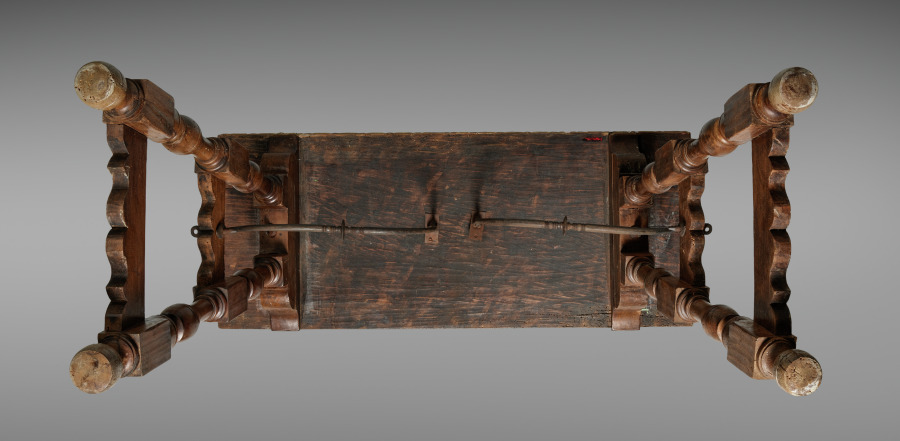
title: Chest (Base)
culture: Spain, Colonial, late 17th Century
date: late 1600s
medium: turned and joined wood with wrought iron hardware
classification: Furniture and woodwork